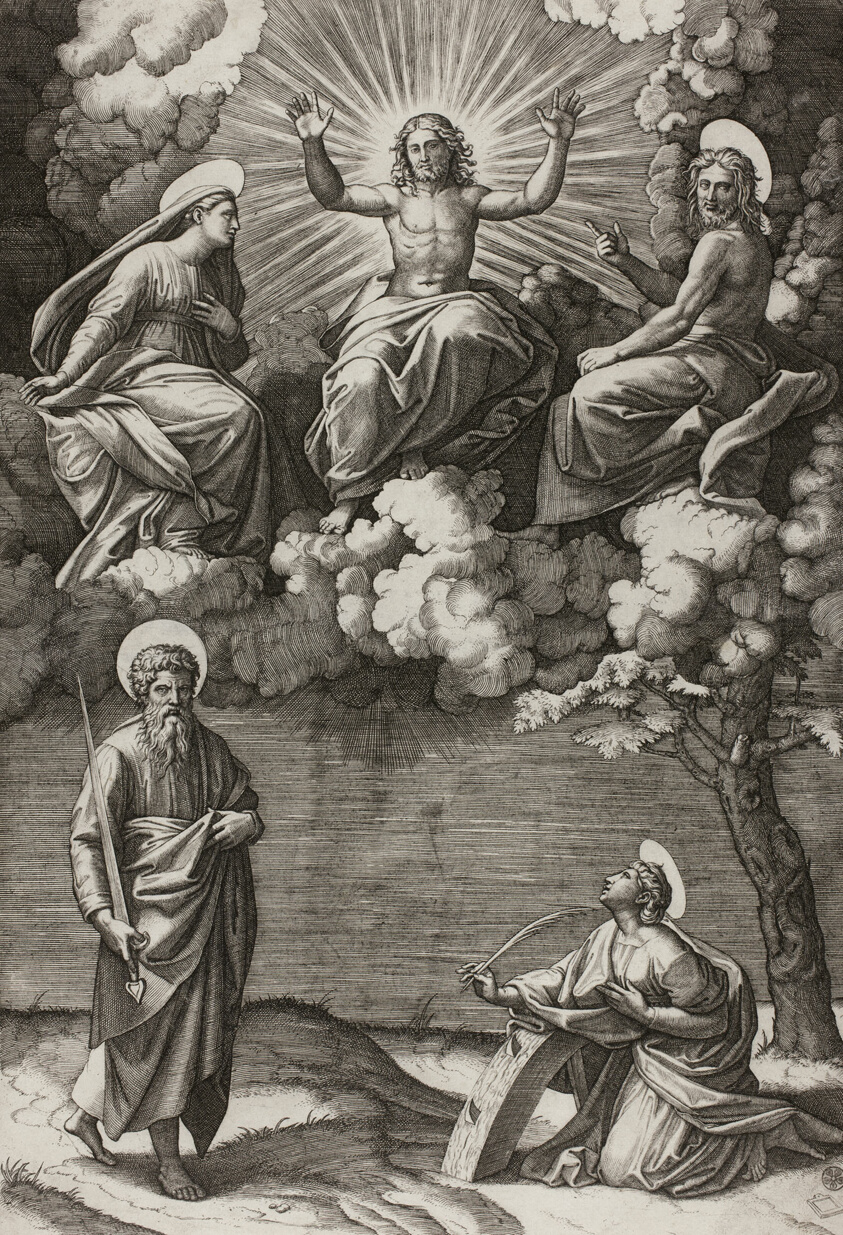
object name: Print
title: Christ, the Virgin, and Saint John the Baptist with Saints Paul and Catherine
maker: Marcantonio Raimondi (Italian, c. 1480-1534); after Raffaello Sanzio, called Raphael (Italian, 1483–1520)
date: 1520-/25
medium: Engraving in black on ivory laid paper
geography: Italy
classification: engraving; print; prints and drawing